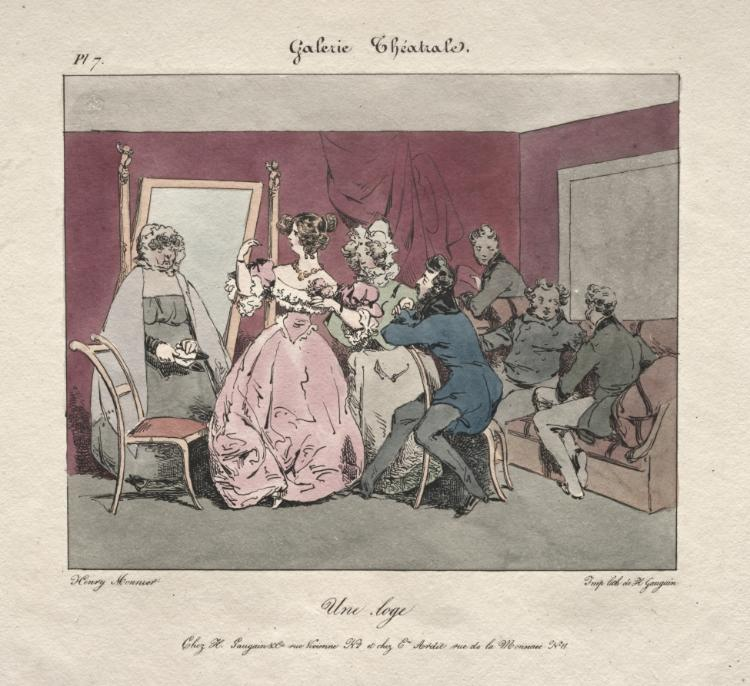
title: A Loge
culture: France, 19th century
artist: Henry Bonaventure Monnier (French, 1805–1877)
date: c. 1828–30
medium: color lithograph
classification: Print